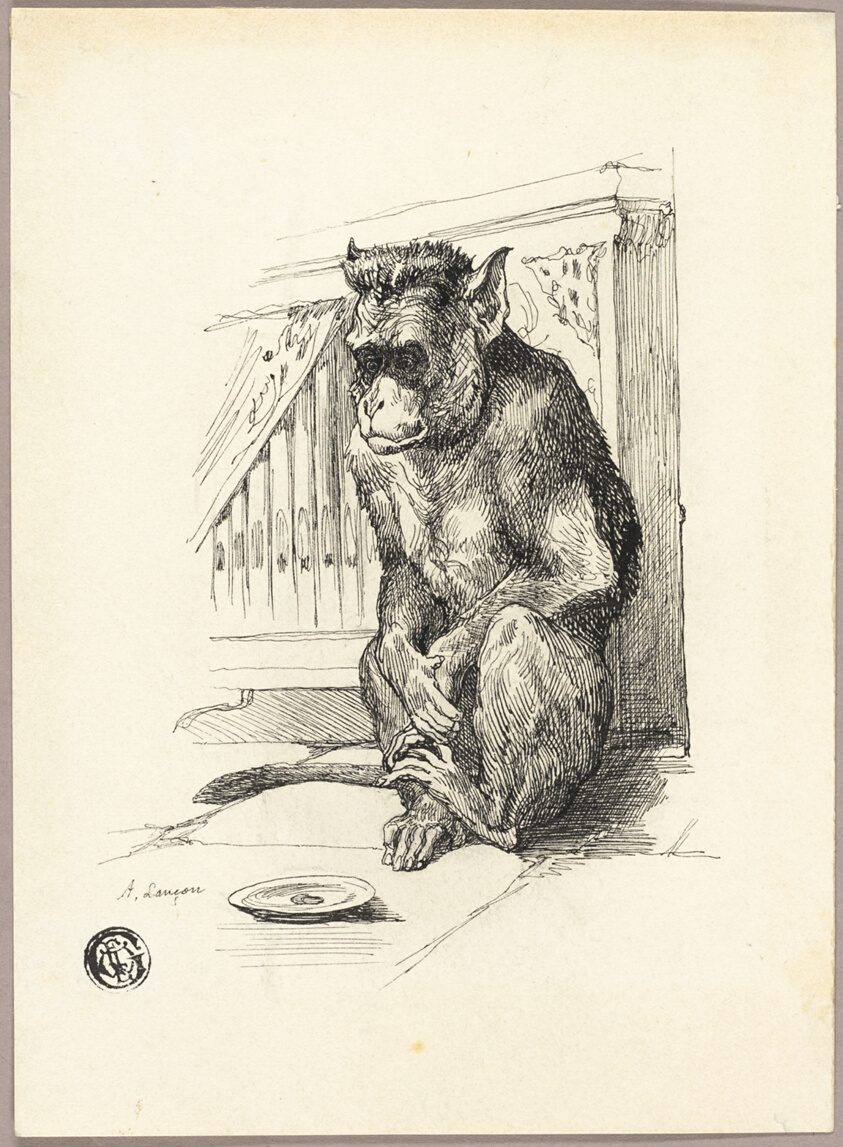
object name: Drawing and Watercolor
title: Begging Monkey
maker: Auguste Andre Lançon; French, 1836-1887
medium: Pen and black ink on ivory wove paper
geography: France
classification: pen and ink drawings; drawings (visual works); prints and drawing